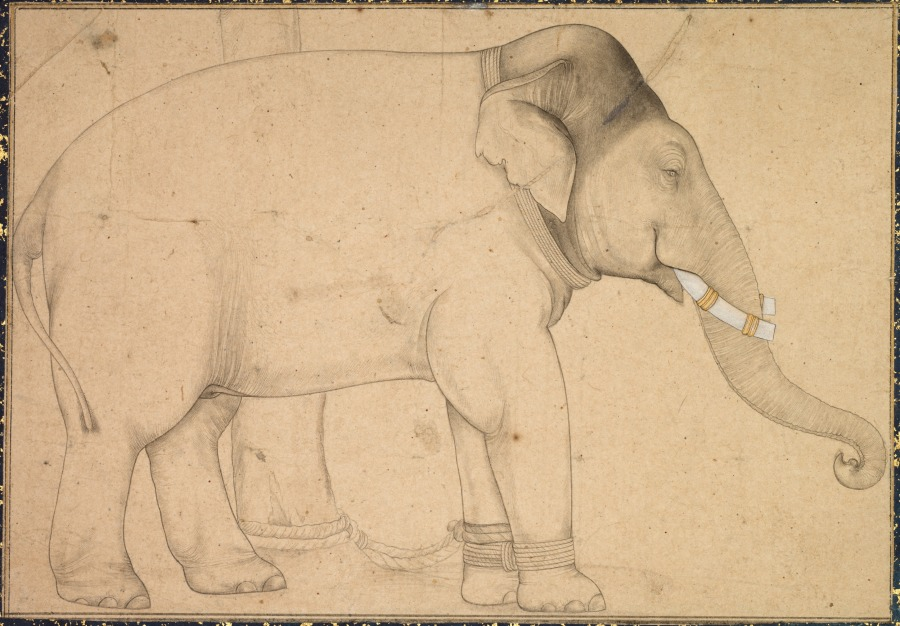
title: Drawing of an Elephant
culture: India, Mughal School, early 18th Century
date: c. 1700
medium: ink on paper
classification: Painting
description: Beginning with Babur, but especially with Akbar, the Mughal emperors displayed an enormous interest in and affection for the elephants of India. The palace housed many elephants, used by the royal court for practical tasks such as carrying heavy loads through rivers and over difficult ground, for charging into battle, and, sometimes, for executing captives. They were also used for entertainment purposes such as riding, ceremonial processions, hunting, and fighting. Royal elephants were cared for by trained staff and kept on a special diet. Their tusks, necks, and ankles were often decorated with golden chains and hoops encrusted with jewels and pearls.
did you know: Domesticated elephants had their tusks trimmed and decorated with gold rings.